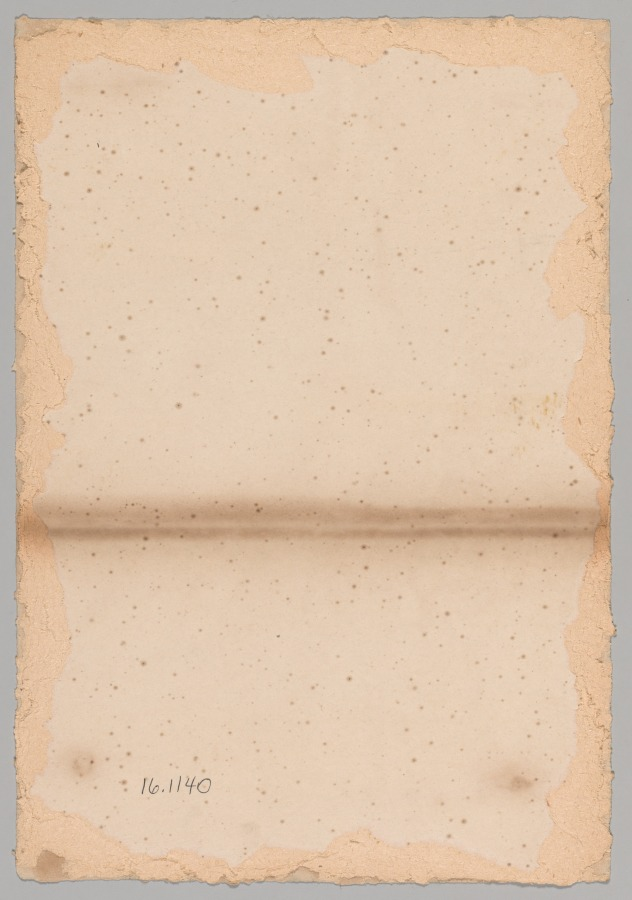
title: Actors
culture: Japan, Edo period (1615–1868)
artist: Utagawa Toyokuni (Japanese, 1769–1825)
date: 1769–1825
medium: color woodblock print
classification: Print